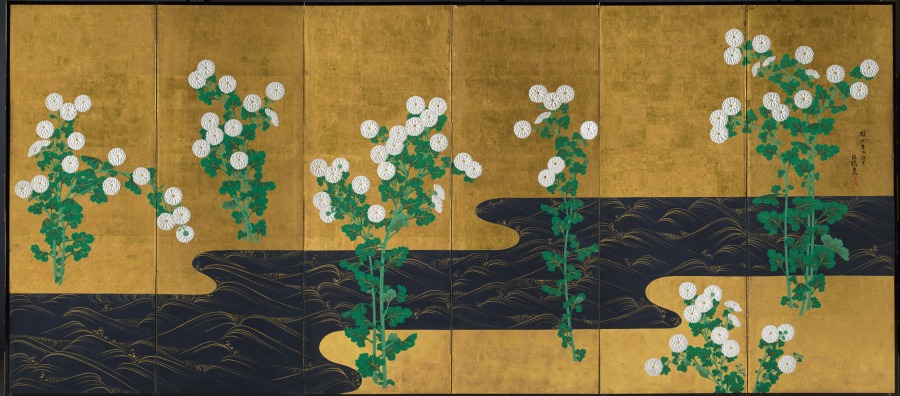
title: Chrysanthemums by a Stream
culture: Japan, Edo period (1615–1868)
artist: possibly by Ogata Kōrin (Japanese, 1658–1716)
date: c. 1715–30 or later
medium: One of a pair of six-panel folding screens; ink and color on gilded paper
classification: Painting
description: These screens recall a painting style so closely identified with Ogata Kōrin (1658–1716) that it is called Rinpa, or “Rin School,” after the ideograph “rin” in his name. The highly stylized background accentuates floral groupings that have been groomed so as to appear utterly artificial, like the synthetic arrangements available today. Kōrin's genius derived in large measure from natural phenomena painstakingly observed and then manipulated to create compositions of startling refinement and sparkling isolation. This process may have grown out of Kōrin's early immersion in the family textile business, a medium that encourages such dramatic distillations of form: the stream's gold-crested waves bring to mind traditional kimono robe designs of Kōrin's era. Works with the signature seen on this painting, including a style name, or persona suggested to Kōrin by his brother Kenzan (1663–1743), are sometimes considered to have been produced either in the last year of his life, when he was very ill, or after his death. In both scenarios, the lion’s share of the work would have been done by studio assistants, but little is truly known of his studio practice. Given the regularity of the gold waves on the stream, and the tension in the arrangement of the chrysanthemums, it is also possible that the screens were made in emulation of Kōrin's designs by a later artist.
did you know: The signature used on these screens may indicate paintings made in the last year of the artist's life, or works completed by his studio after his death.